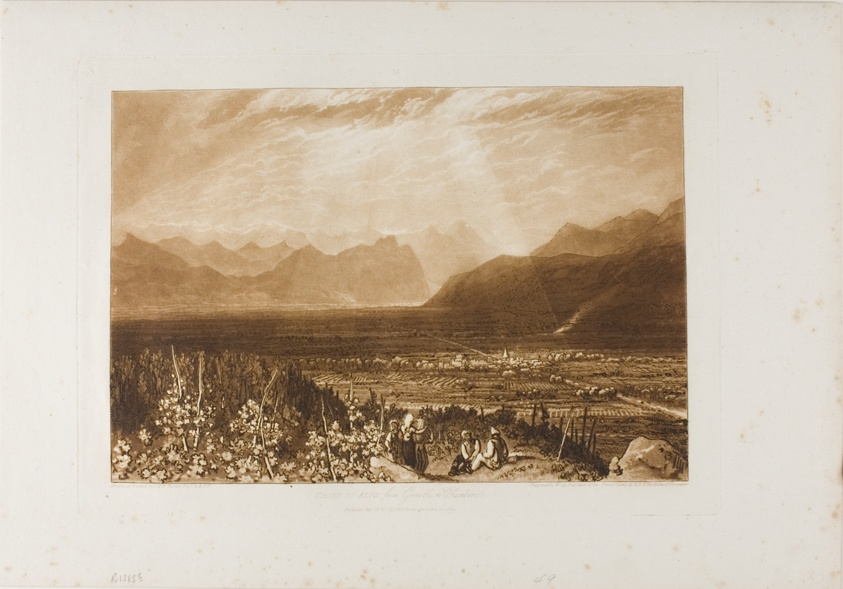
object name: Print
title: Chain of Alps from Grenoble to Chamberi, plate 40 from Liber Studiorum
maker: Joseph Mallord William Turner (English, 1775-1851); Engraved by William Say (English, 1768-1834)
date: published May 23, 1812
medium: Etching and mezzotint in brown on ivory laid paper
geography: England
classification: etching; print; prints and drawing